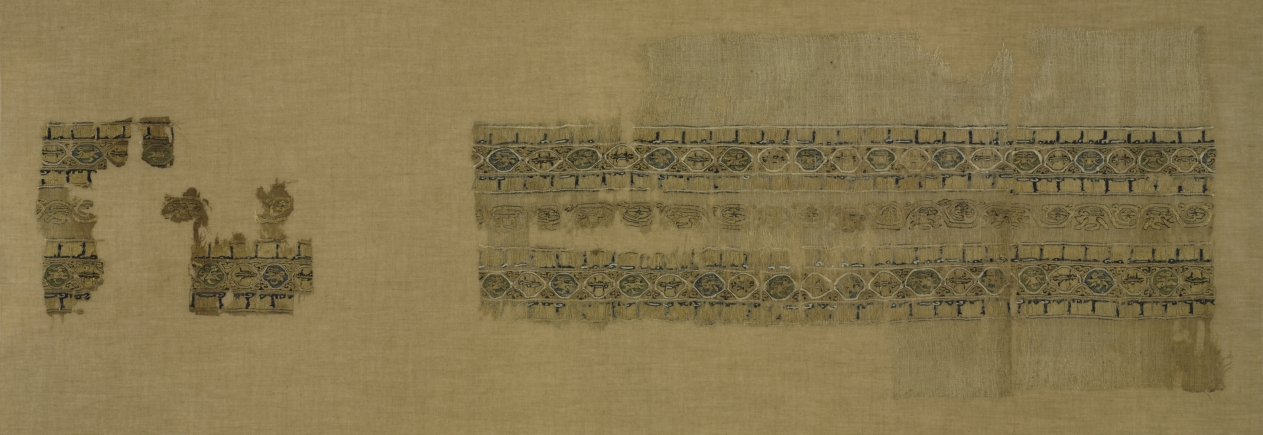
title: Tiraz with gold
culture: Egypt, Fatimid period, reign of Caliph al-Musta‘lī, 1094–1101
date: 1094 – 1101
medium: plain weave with inwoven tapestry weave: linen, silk, and gold filé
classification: Textile